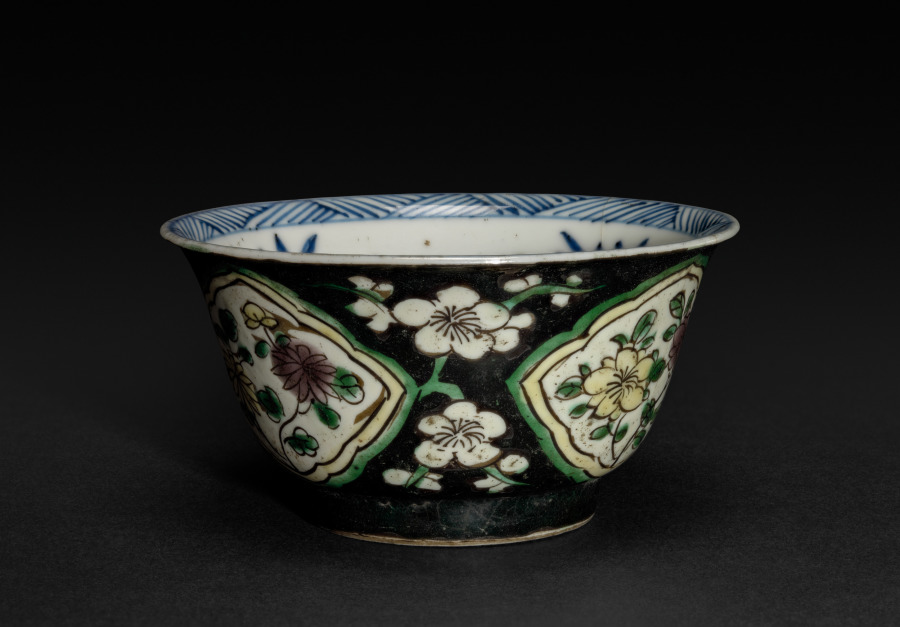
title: Cup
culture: China, Qing dynasty (1644-1911), Kangxi reign (1662-1722)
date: 1662–1722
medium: porcelain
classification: Ceramic